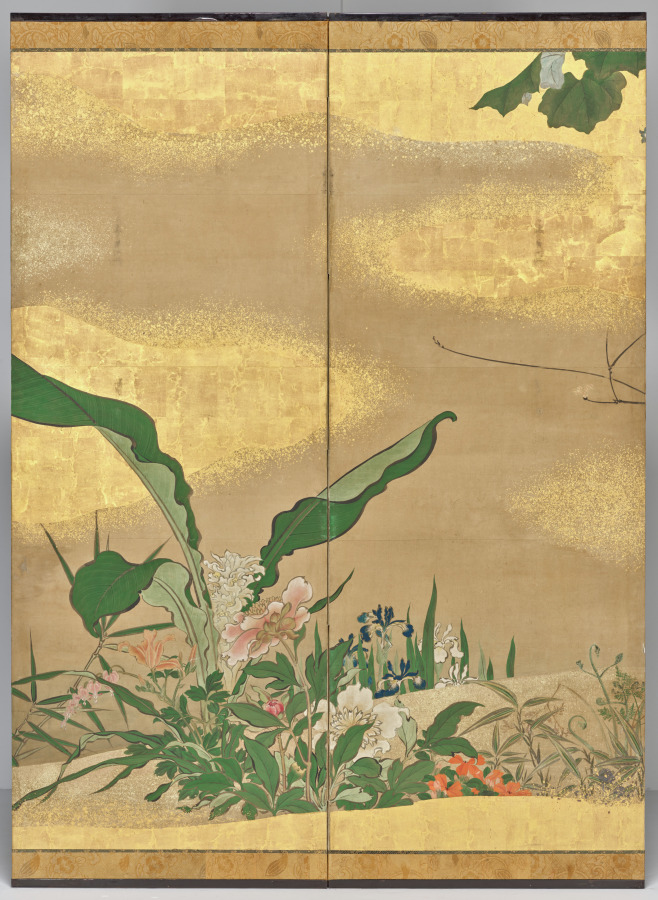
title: Flowers and Trees of the Four Seasons (right screen)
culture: Japan, Edo period (1615–1868)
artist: Watanabe Shikō (Japanese, 1683–1755)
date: early to mid-1700s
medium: Six-panel folding screen; ink, color, gold, silver, and gilding on paper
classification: Painting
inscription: 始興之印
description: The painter Watanabe Shikō had a special interest in scientific realism, based on interactions with his patron Konoe Iehiro. Shikō combined his attention to accurate depiction of plants with strong ink outlines and decorative elements like gold and silver, arriving at an innovative style that influenced many of his peers in the city of Kyoto.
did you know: One plant in these screens, tumeric, or ukon in Japanese, is found in Okinawa.